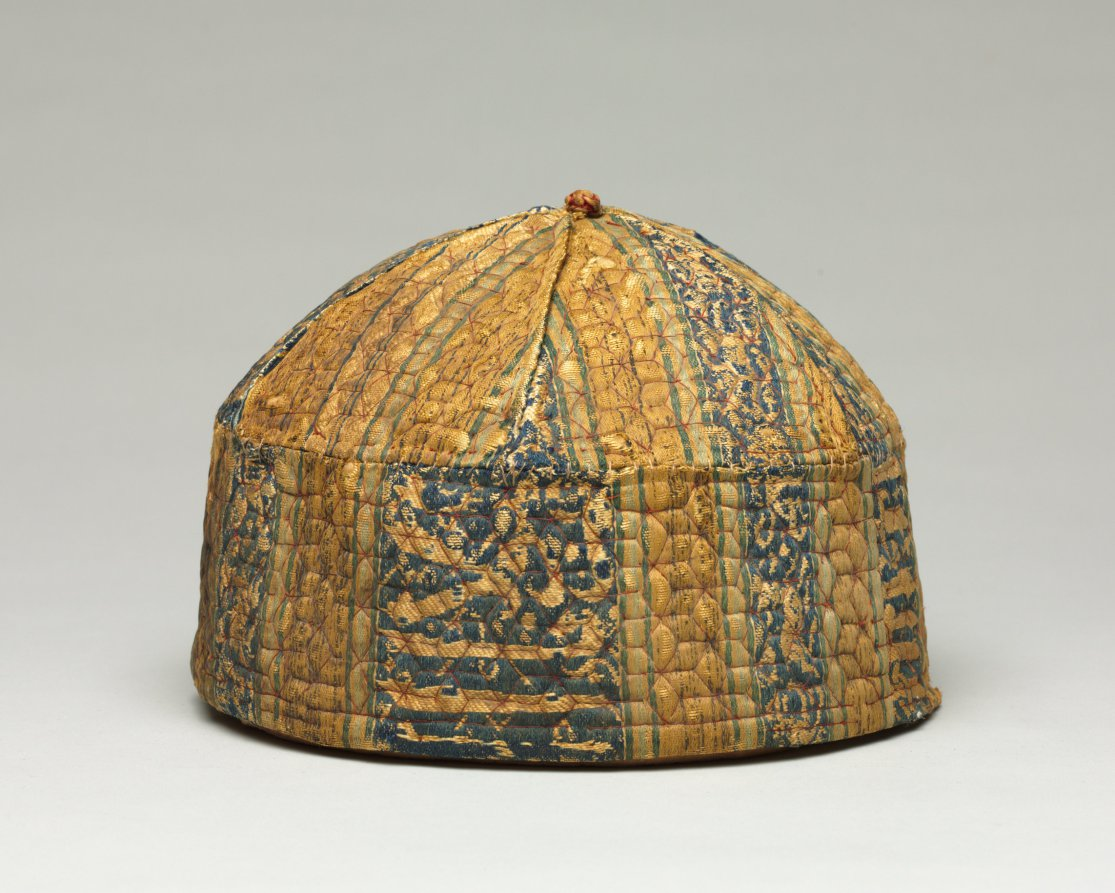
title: Cap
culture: Syria or Egypt, Mamluk Dynasty (1250–1517)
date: 1300s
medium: lampas, quilted: silk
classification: Textile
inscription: 1) Glory to our Lord, the Sultan 2) Glory to our Lord, the Sultan al-Malik, al-Nasir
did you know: The winter-weight quilted cap was part of a set with a matching quilted vest.